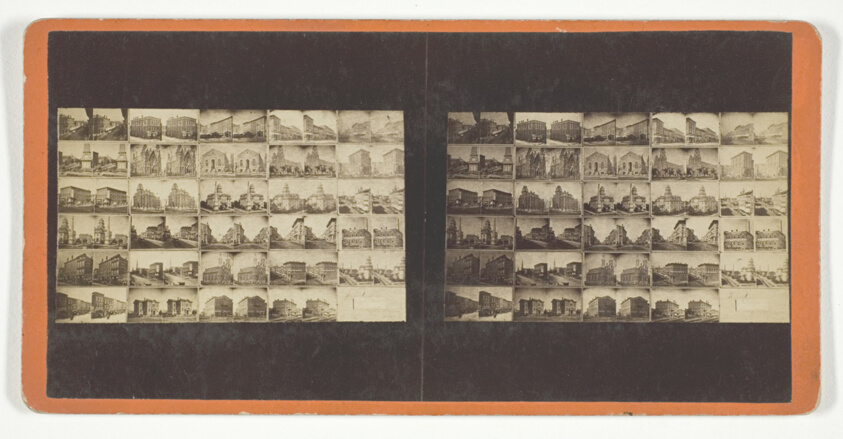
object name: Photograph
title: Untitled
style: 19th century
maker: C. H. Wareham; American, active late 19th century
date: Late 19th century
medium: Albumen print, stereo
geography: Illinois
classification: photography; photograph